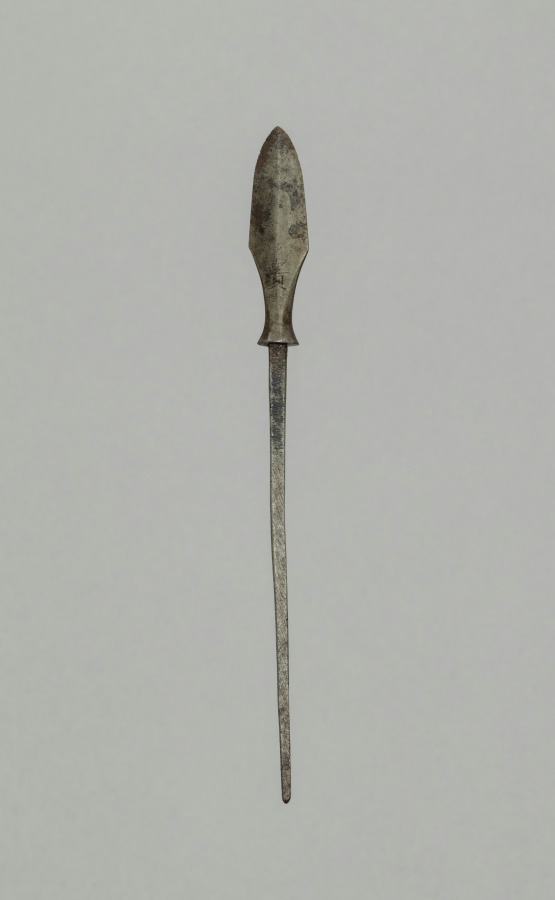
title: Arrow Point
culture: Japan, Edo period (1615–1868)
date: 1700s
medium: steel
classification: Arms and Armor